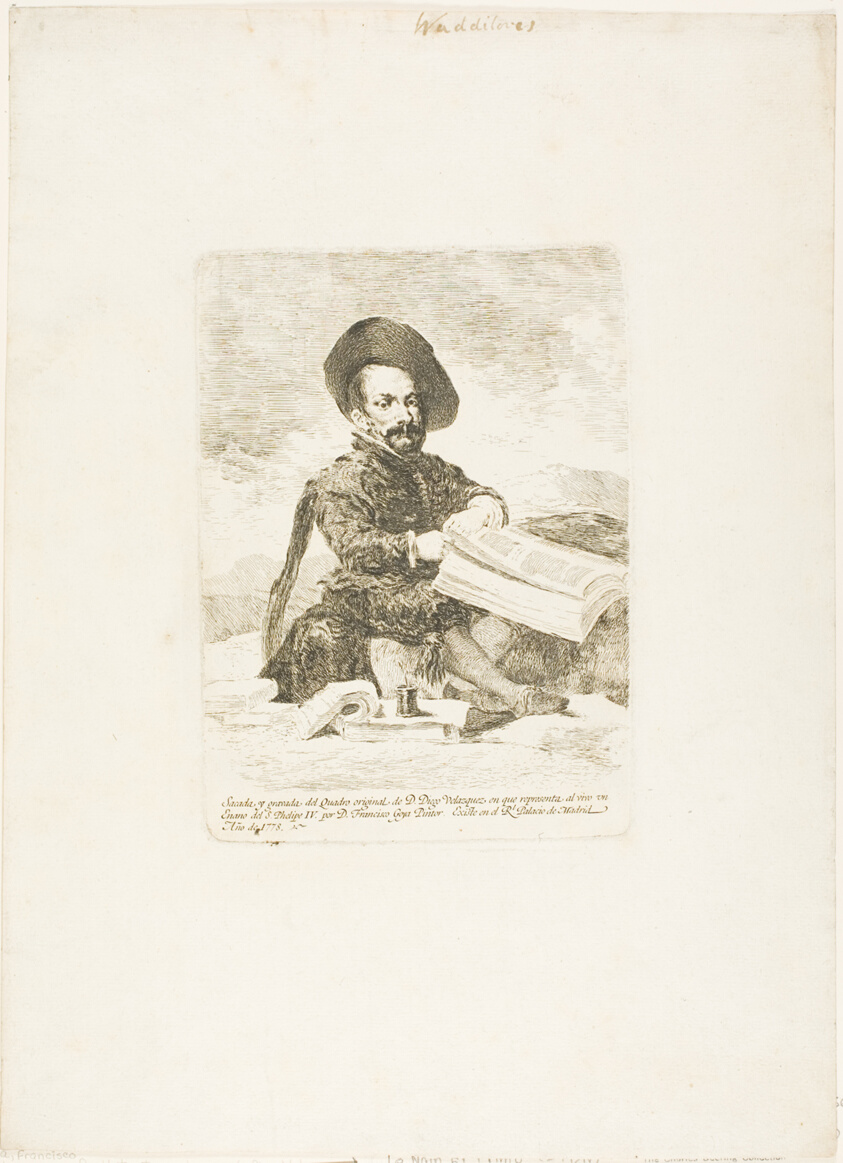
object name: Print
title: A Dwarf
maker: Francisco José de Goya y Lucientes (Spanish, 1746-1828); after Diego Velázquez (Spanish, 1599-1660)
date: 1778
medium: Etching with engraved inscription on laid paper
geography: Spain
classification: etching; print; prints and drawing